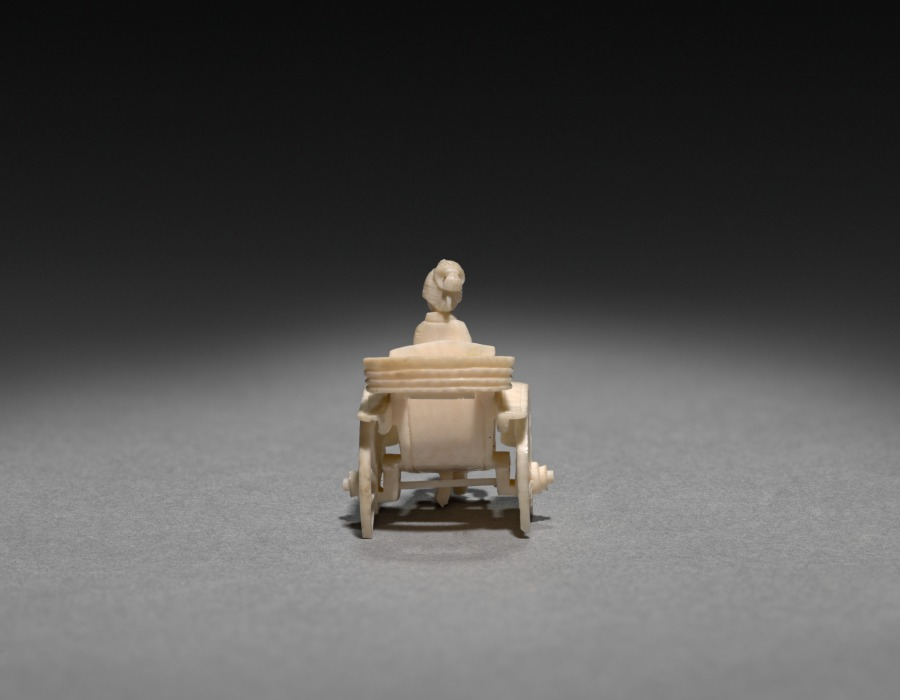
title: Woman in a Jinrikisha (Rickshaw)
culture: Japan, Meiji period (1868–1912)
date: early 1900s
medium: ivory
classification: Ivory